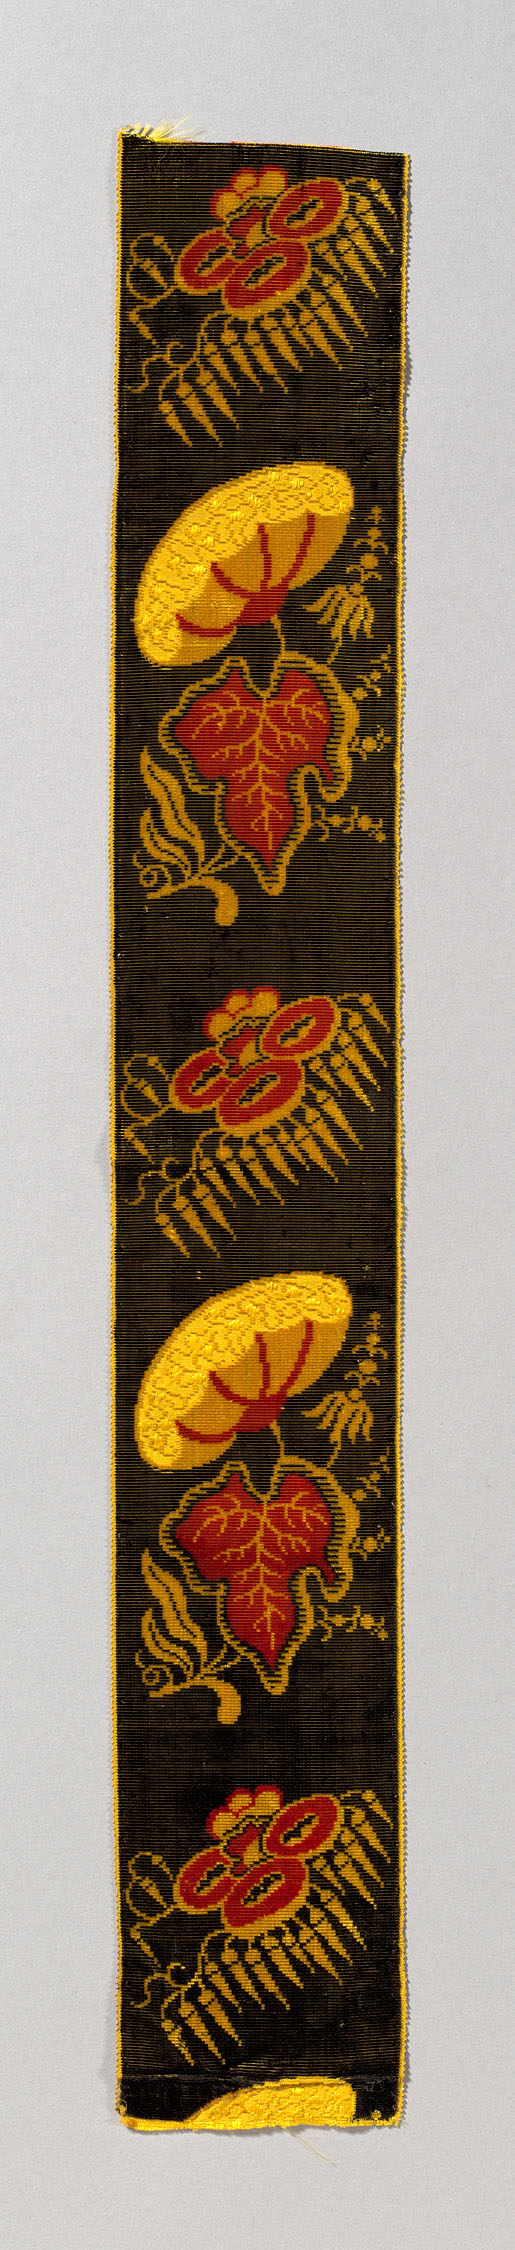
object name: Textile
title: Ribbon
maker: France, Provence-Alpes-Côte-d'Azur Région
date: 19th century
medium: Silk, plain weave with supplementary three-color pile warps forming cut voided velvet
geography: France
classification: textile; weaving - velvet